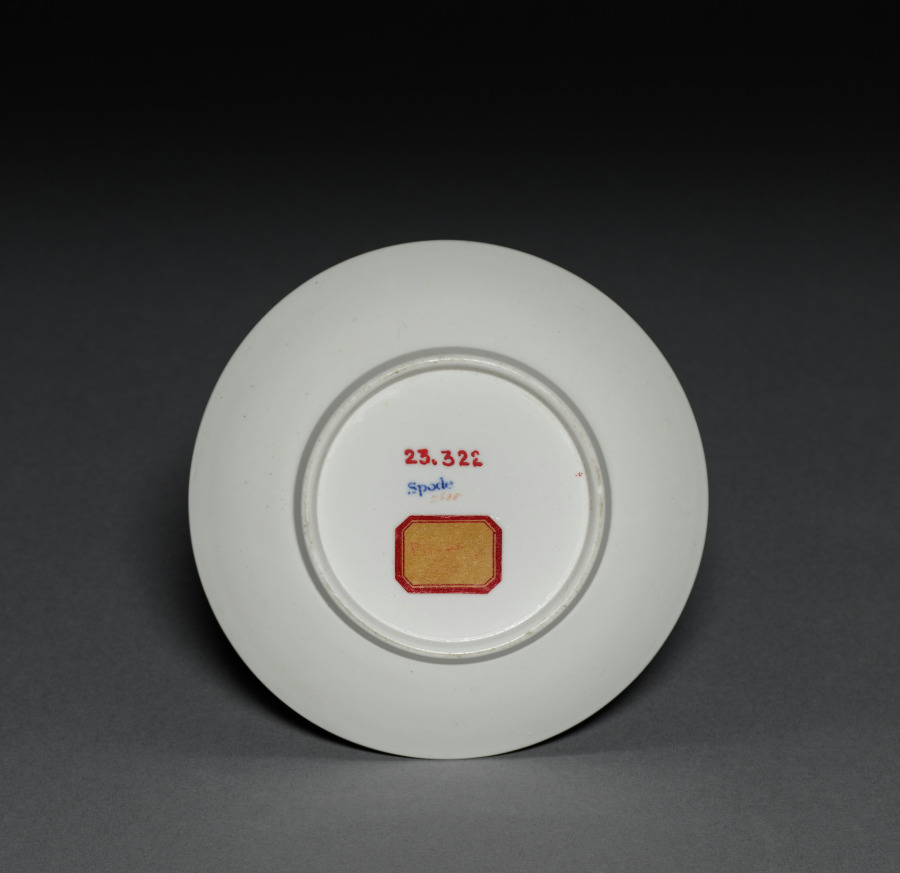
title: Saucer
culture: England, Staffordshire, 18th-19th century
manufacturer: Spode Factory (British)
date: 1700s-1800s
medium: porcelain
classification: Ceramic